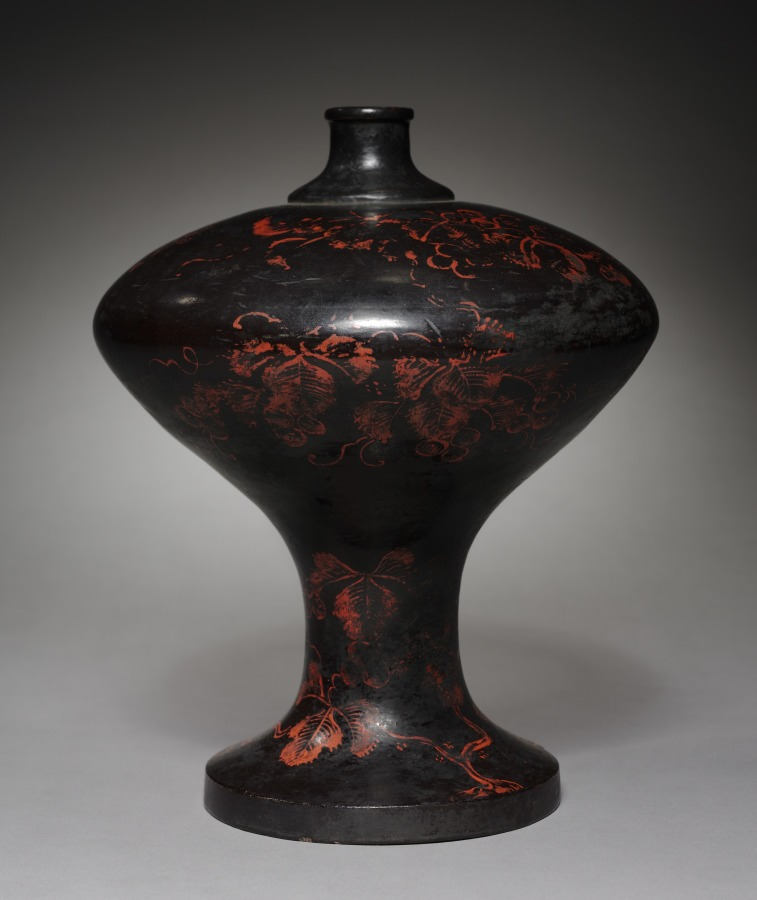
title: Sake Flask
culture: Japan, Muromachi period (1392–1573)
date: 1500s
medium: Black laquered wood with red lacquer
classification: Lacquer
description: This flask contained rice wine, or sake. Its wood body was shaped by a lathe before black lacquer was applied to the surface. A red lacquer design of grapevines, an auspicious motif, covers the surface. With their numerous, long-lasting fruits, grapevines traditionally symbolized fertility and longevity in East Asia.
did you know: The evocative imagery of brushed leaves and bunches of grapes suggest that the artist referred to a particular painting when decorating this vase.